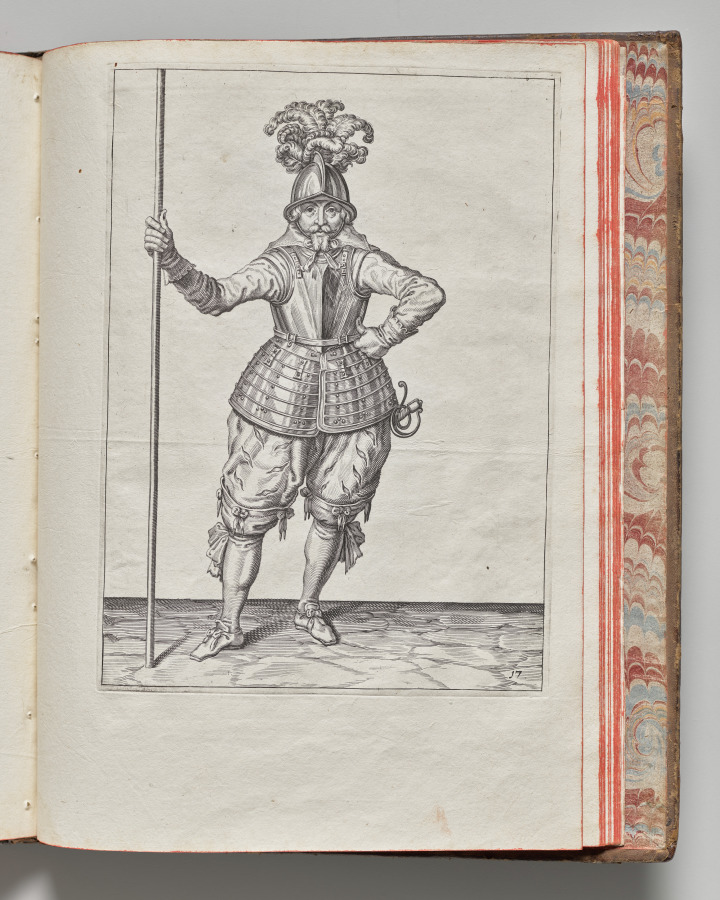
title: The Exercise of Armes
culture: Netherlands, The Hague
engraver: Jacob de Gheyn II (Netherlandish, 1565–1629)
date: 1607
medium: leather bound paper, 117 engraved plates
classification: Bound Volume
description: The Exercise of Armes, published in 1607–8, is one of the most famous manuals of arms. Jacob De Gheyn's book became popular all over Europe and was quickly translated into several languages. Its 117 copper engravings portray the step-by-step sequence for training foot soldiers in the handling of standard weaponry of 17th-century warfare: muskets, matchlock or calivers, and pikes.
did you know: The depiction of the soldiers in this book inspired Rembrandt when painting his famous The Night Watch.